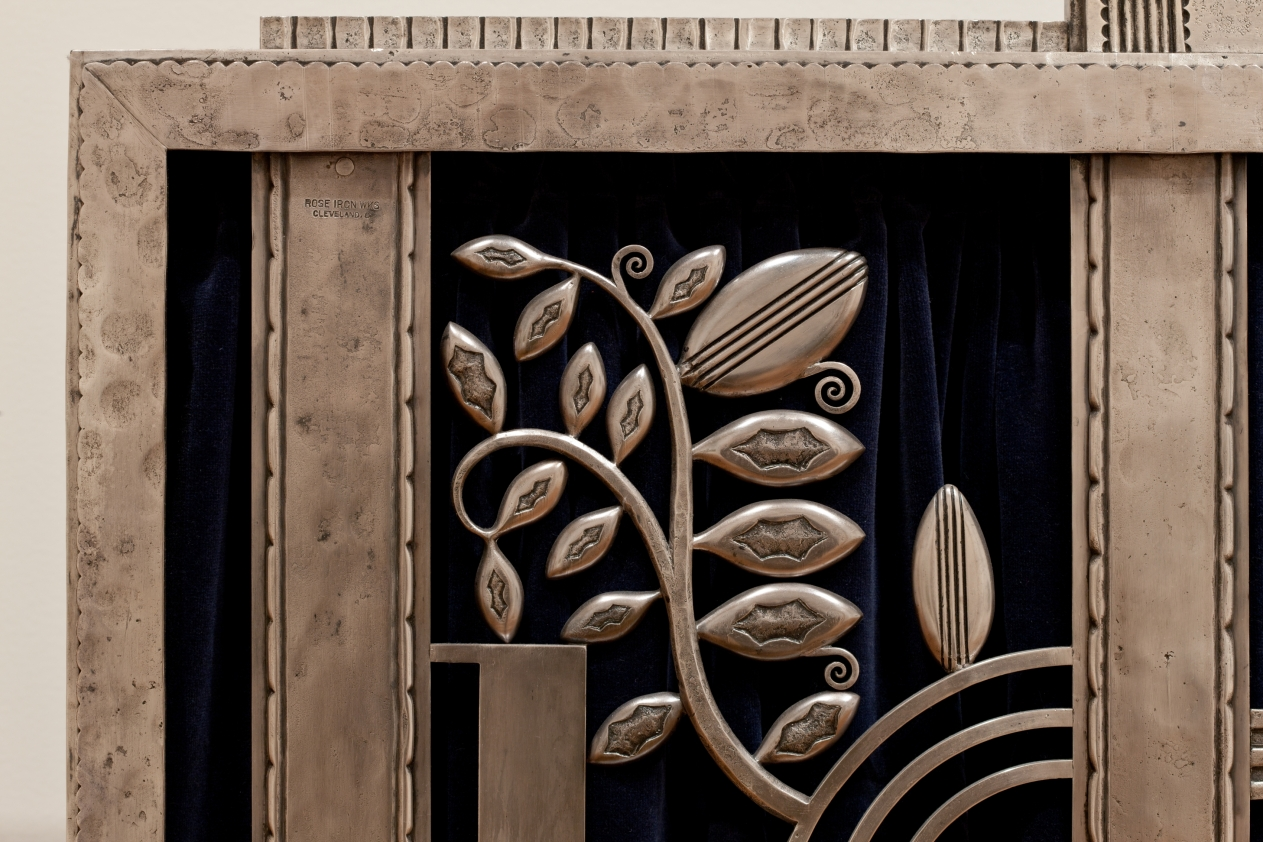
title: Muse with Violin Screen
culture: America, Ohio, Cleveland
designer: Paul Fehér (American, born Hungary, 1898–1990)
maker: Rose Iron Works (America, Ohio, Cleveland, est. 1904)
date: 1930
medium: Steel, brass; silver and gold plating, cotton velveteen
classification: Metalwork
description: Since the early years of the 20th century, the Rose Iron Works, a Cleveland supplier of architectural ornament, has produced distinguished metalwork. The company’s founder, Martin Rose, was born in Austria-Hungary and studied ornamental metalsmithing in Vienna prior to immigrating to Cleveland in 1902. In the 1920s, he hired a talented young Parisian designer, Paul Fehér, to work for the firm. Fehér’s designs, culminating in this massive screen, brought a modern European sensibility to the Rose Iron Works production. With its geometric patterning, highly stylized and abstracted natural forms, and the central figure reminiscent of the celebrated jazz singer Josephine Baker, this screen reflects the classic motifs of Art Deco design.